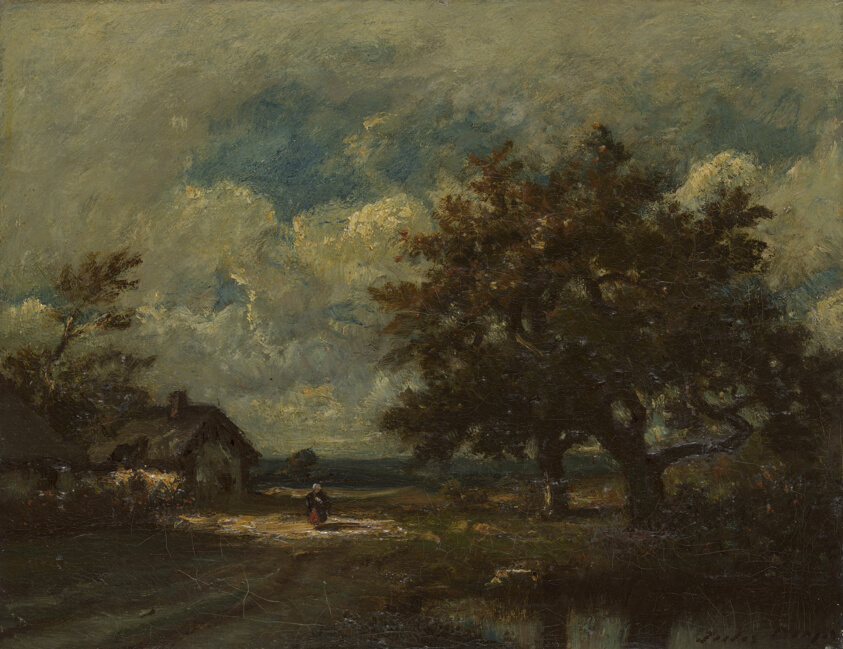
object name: Painting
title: The Cottage by the Roadside, Stormy Sky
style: nineteenth century, 19th century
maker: Jules Dupré (French, 1811–1889)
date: c. 1860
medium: Oil on canvas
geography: France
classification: painting; oil on canvas; oil paintings (visual works); paint; french; european painting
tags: countryside, building, buildings, clouds, France, French, house, nature, paths, peasants, pond, road, rural life, sky, tree of life, water, woman